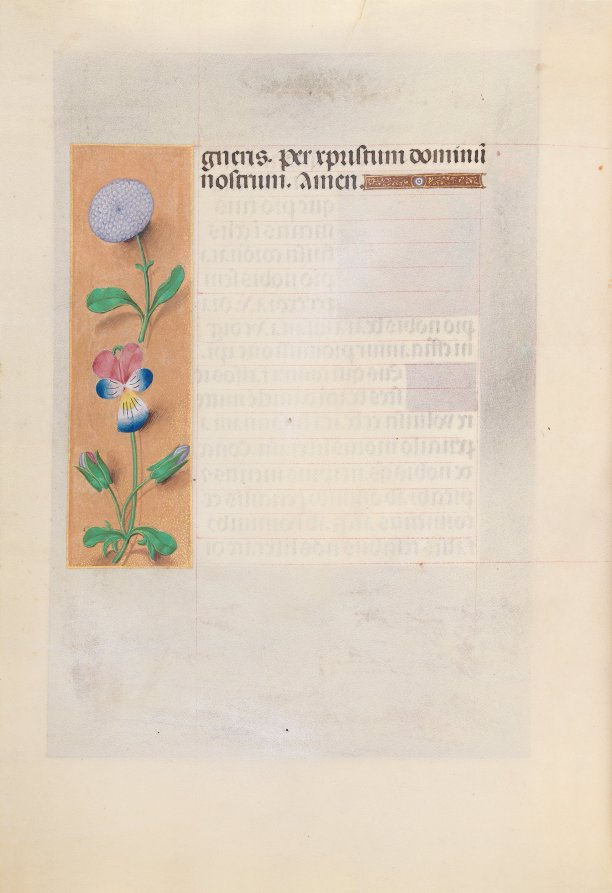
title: Hours of Queen Isabella the Catholic, Queen of Spain: Fol. 196v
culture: Flanders, Ghent and Bruges, late 15th century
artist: Master of the First Prayerbook of Maximillian (Flemish, c. 1444–1519)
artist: and Associates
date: c. 1500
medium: ink, tempera, and gold on vellum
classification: Bound Volume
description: This manuscript was illuminated by a circle of at least five highly organized manuscript painters active in the Flemish cities of Ghent and Bruges. The principal illuminator was Alexander Bening, who painted the majority of the book's miniatures. Manuscripts produced by this circle of artists are renowned for the decoration of their borders, which typically feature a rich variety of realistically-painted flowers, birds, and butterflies. This prayer book, called a book of hours, was intended not for a cleric, but for the private devotions of a lay person-in this case, Isabella the Catholic, Queen of Spain (1451-1504). Isabella's coat of arms embellishes the book's frontispiece. It is unlikely that the book was commissioned by the Queen herself; rather, she probably received it as a diplomatic gift from someone courting her patronage, perhaps Cardinal Francisco Jimenez de Cisneros. A Franciscan friar, Jimenez was dependent upon Isabella for his advancement, first to the post of Queen's confessor in 1492, and then to Archbishop of Toledo in 1495.